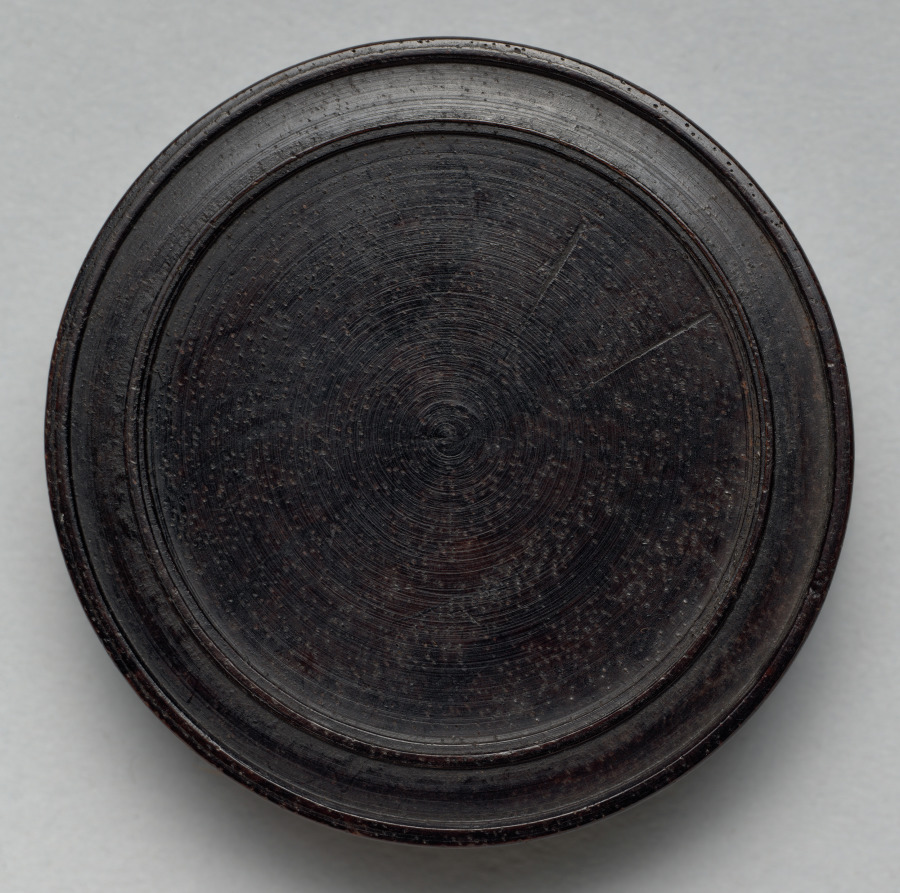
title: Gaming Piece (obverse)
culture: Germany, late 17th-early 18th Century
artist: Martin Brunner (German, 1659–1725)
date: c.1700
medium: wood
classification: Furniture and woodwork